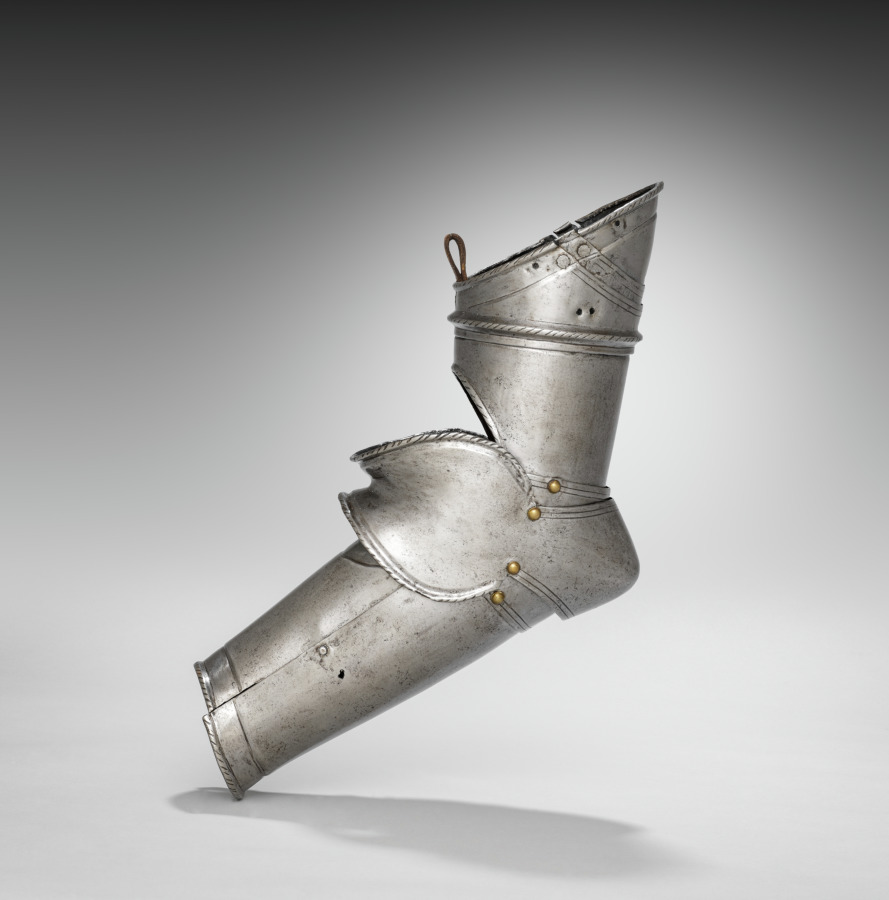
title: Proper Left Arm (Vambrace, Rerebrace and Couter)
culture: South Germany, 16th century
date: c. 1560–1580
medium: steel, leather straps, brass rivets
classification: Arms and Armor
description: This armor was developed for the joust-a sporting combat between two mounted contestants. Although all of the elements of this armor date from the same period, they are not all from the same suit. This armor is thus called "composed." It also shows the asymmetry of jousting armor. The participants rode along a wall-like barrier known as a "tilt" with their left sides facing one another. Consequently, armor on that side of the body had to be thicker. Note the large plate (grandguard) over the left shoulder for extra protection. Also, the breathing holes in the helmet were placed on the right side (farthest from an opponent's lance) to avoid injuries from splinters. The bracket attached to the right breastplate is called the lance-rest, a shock-absorbing support designed to accommodate the lance when "couched" under the right armpit.